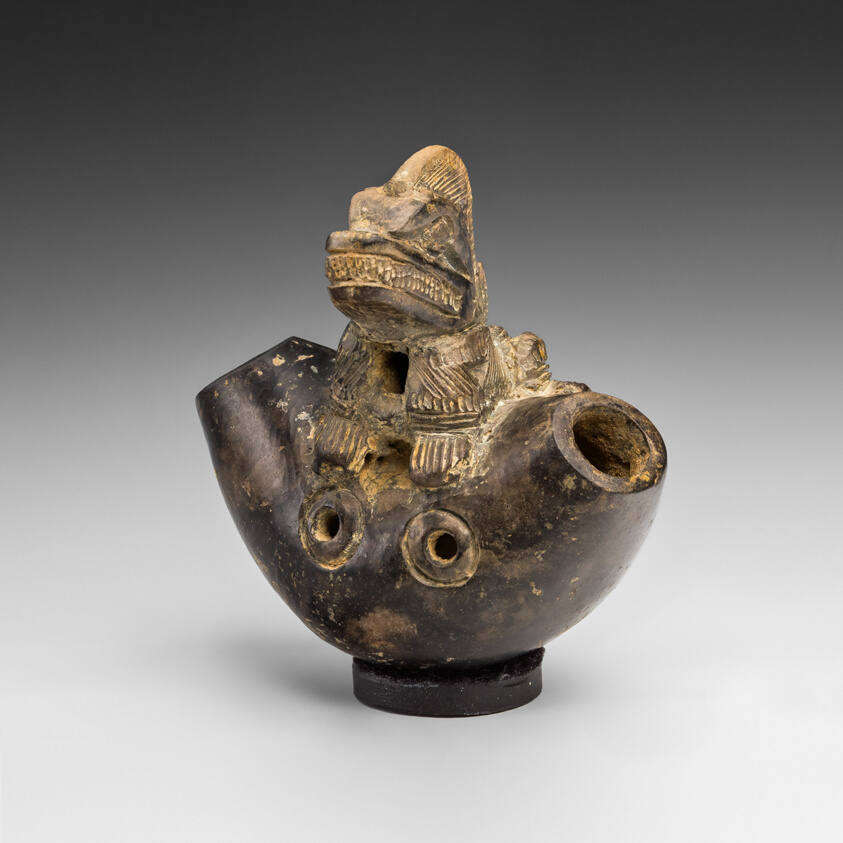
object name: Decorative Arts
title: Whistle with an Iguana or Saurian Sculpted on its Surface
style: tairona, americas, lower central america, Arts of the Americas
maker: Artist unknown (Tairona); Sierra Nevada de Santa Marta, Colombia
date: c. 1300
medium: Ceramic and pigment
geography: Colombia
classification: musical instrument; earthenware; american decorative arts; ceramics; miniature; decorative arts; art of the americas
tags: iguana, musical instruments, saurian